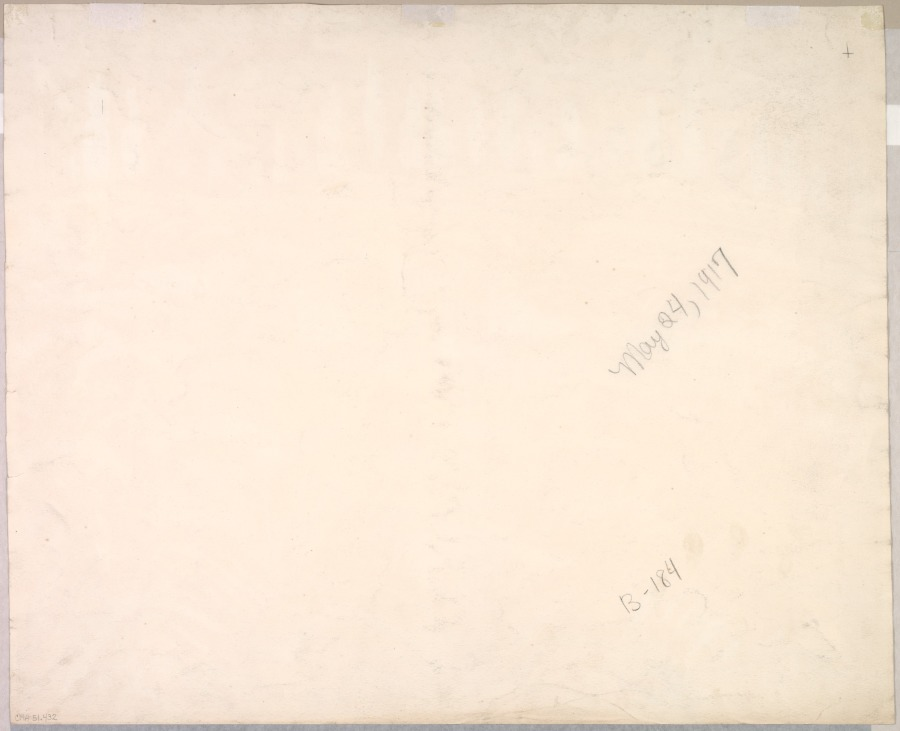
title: Hillside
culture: America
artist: Charles Burchfield (American, 1893–1967)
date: May 24, 1917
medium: Watercolor and opaque watercolor on Strathmore wove paper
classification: Drawing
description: Burchfield was especially drawn to watercolor and experimented avidly with it throughout his entire career. This portable medium allowed him to explore the landscape and continuously rework his compositions. Here, he used shades of green to depict the countryside near his hometown, Salem, Ohio.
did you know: This drawing was made during 1917, which Burchfield describe as his "golden year," the most prolific period of his entire career.